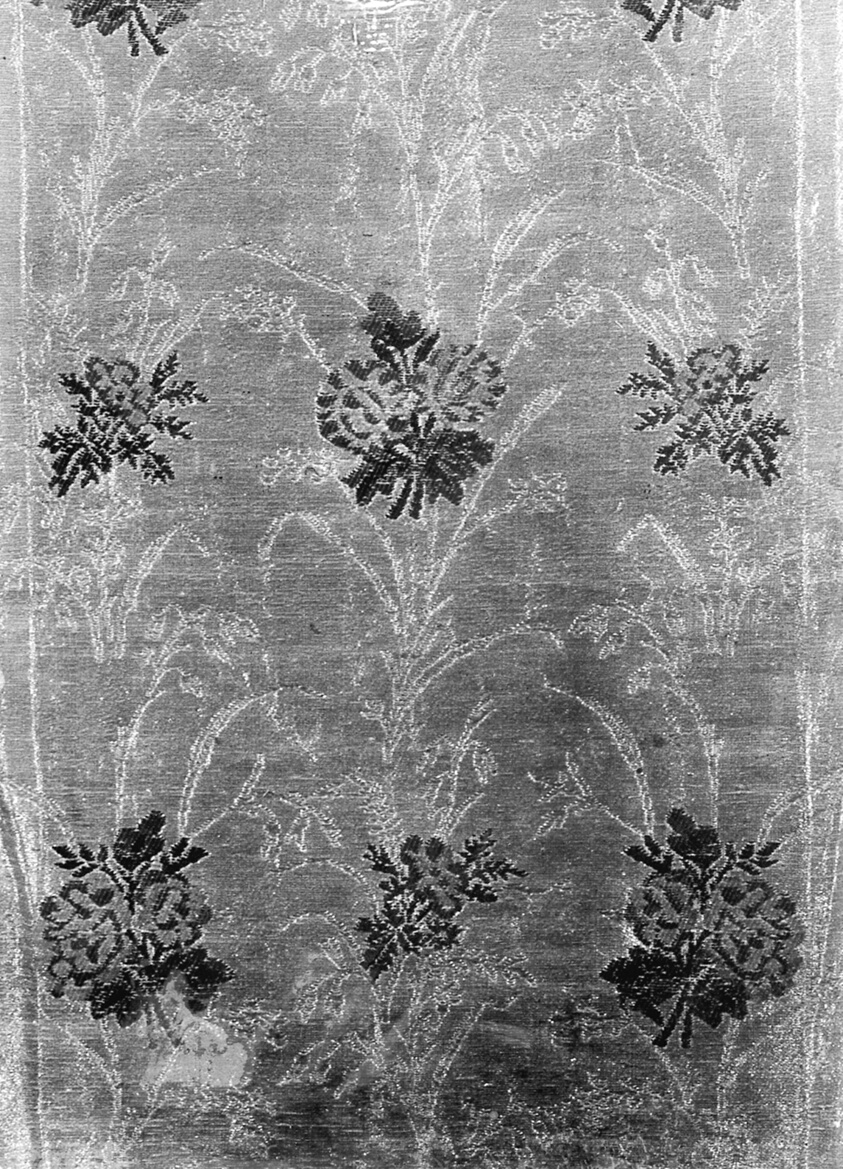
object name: Textile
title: Four Fragments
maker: Russia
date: 19th century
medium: Brocaded plain compound cloth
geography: Russia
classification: textile; weaving